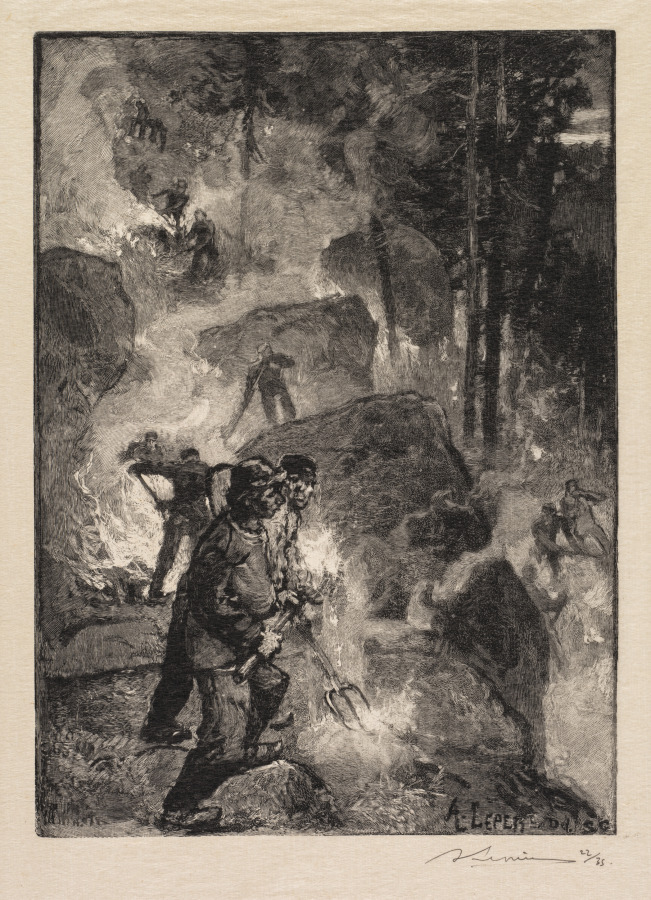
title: Fontainebleau Forest: Fern Burners (La Forêt de Fontainebleau: Les brûleurs de fougères)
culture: France, 19th century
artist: Auguste Louis Lepère (French, 1849–1918)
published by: A. Desmoulins, Published in Revue Illustrée, 1887–90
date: 1890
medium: wood engraving from bound volume of 34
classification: Bound Volume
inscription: Below image, lower right, in black ink: ALepère 22/35; in block, lower right: A. LEPÈRE / Del. sc; on window mat, lower right, in graphite: Les brûleurs de fougères